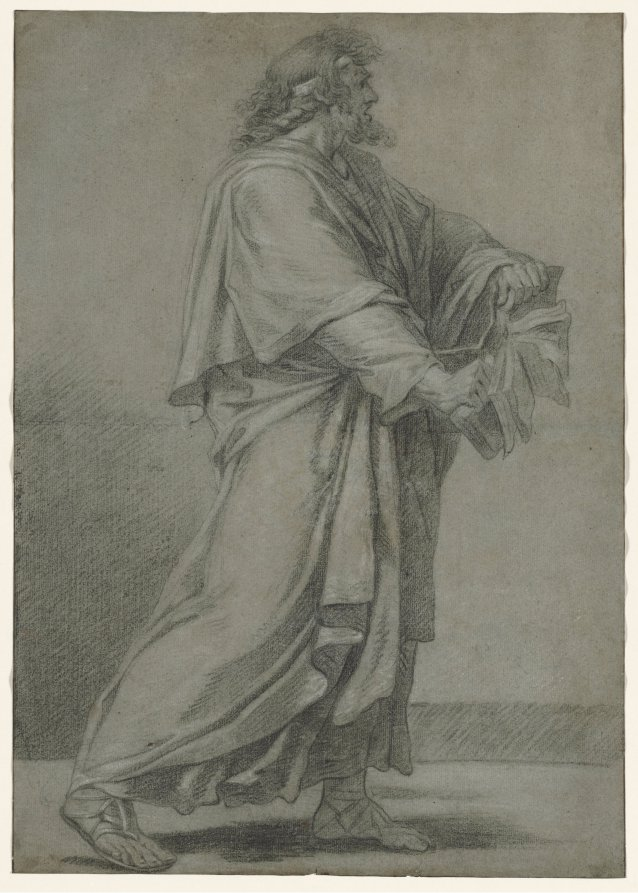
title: Man Destroying Book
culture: France, 18th century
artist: Anonymous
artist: after Eustache Le Sueur (French, 1617–1655)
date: 1700s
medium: black chalk heightened with white chalk; framing lines in black ink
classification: Drawing